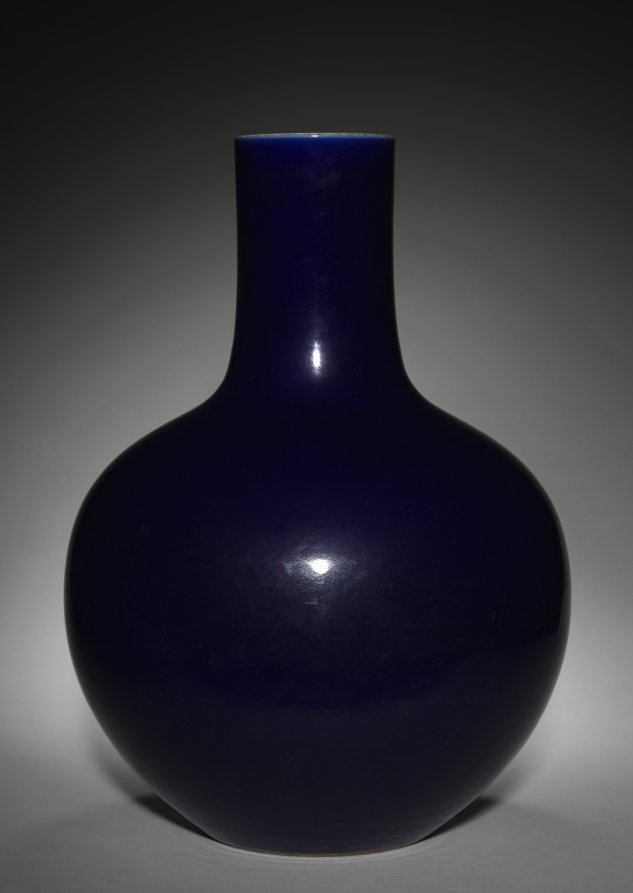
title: Blue Bottle Vase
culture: China, Qing dynasty (1644-1911), Qianlong mark and reign (1736-95)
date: 1736–95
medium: porcelain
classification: Ceramic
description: In the Qing dynasty (1644–1911), luxury items became more affordable to larger parts of the society, including women, merchants, and literati in nonofficial positions. Imperial patronage and a growing urban population encouraged consumption of luxury goods and local craftsmanship. This blue bottle vase exemplifies the technical perfection of Qing dynasty court artisans who surpassed their predecessors in technical skill.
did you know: The vase's lip top, inside, and bottom were glazed with bluish-white with tiny dark speckles.